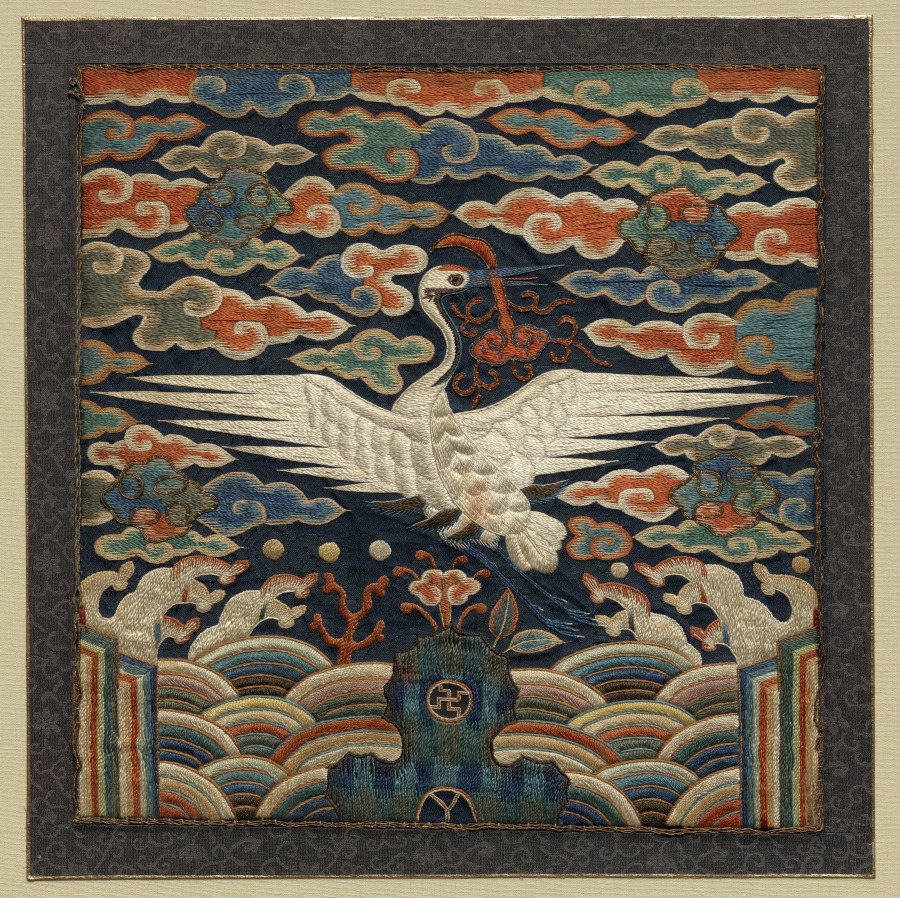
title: Rank Badge with Single Crane Motif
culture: Korea, Joseon dynasty (1392–1910)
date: 1800s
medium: Silk, satin damask weave; silk thread embroidery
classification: Textile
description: Traditionally, square silk badges with embroidered birds and animals were worn on the front and back of official costumes. Rather than simple ornaments, rank badges represent the status of the wearer, with different animals indicating the hierarchy of ranks. The single crane, as on these rank badges, was worn by civil officials of the fourth or higher ranks.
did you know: Many different types of stitches are used in this pair of rank badges. One of them is the couching stitch that uses a thicker foundation thread and a thinner thread. In this work, gold thread is used as the foundation thread.